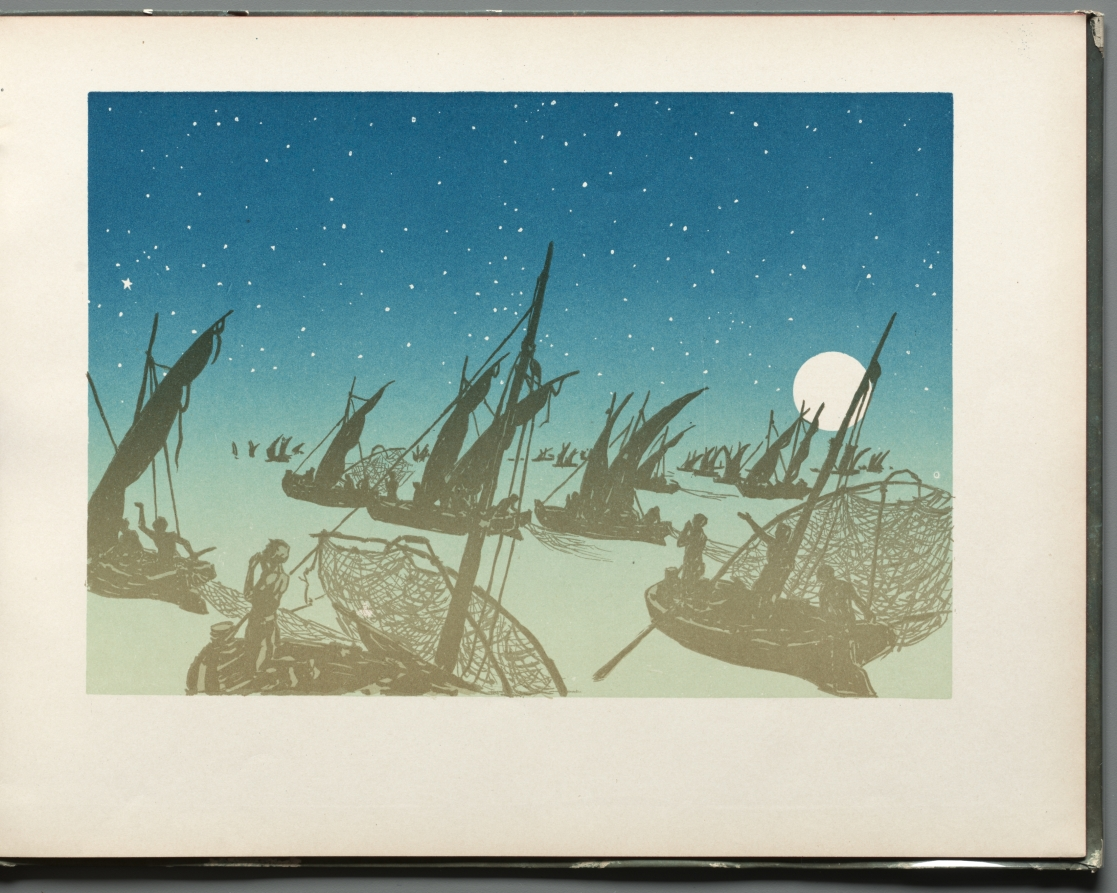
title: The Progress of the Stars: Les Pêcheurs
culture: France, 19th century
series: Bound Volume illustrating the poetry and music of Georges Fragerolle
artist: Henri Rivière (French, 1864–1951)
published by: C. Marpon & Flammarion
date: 1890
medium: 18 color lithographs in a Bound Volume illustrating the poetry and music of Georges Fragerolle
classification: Bound Volume